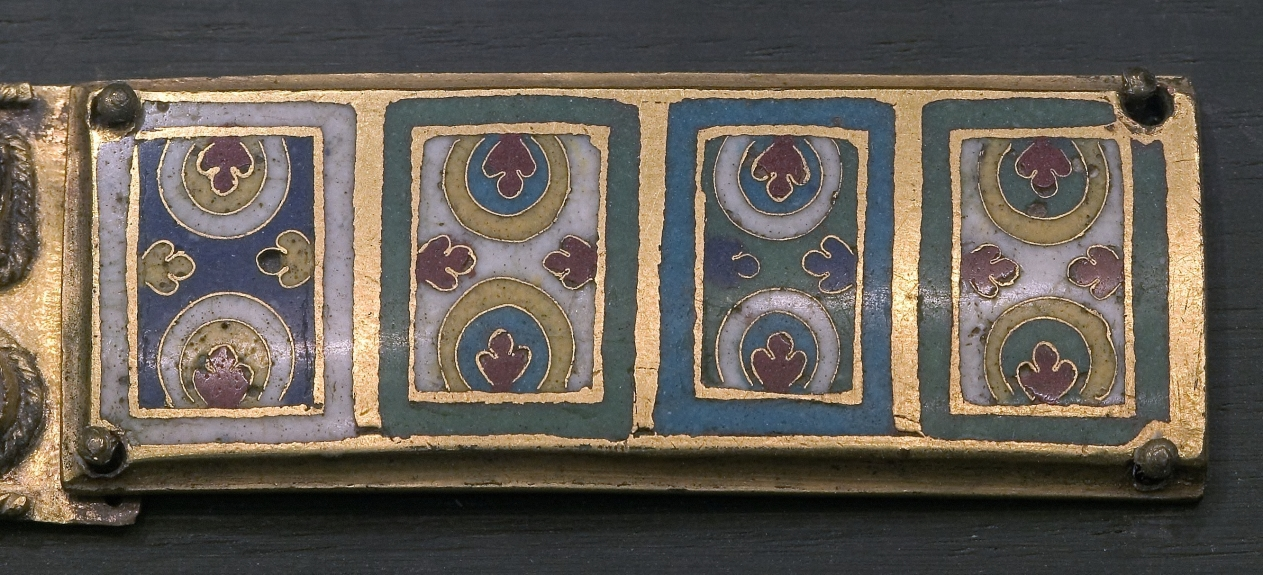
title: Plaque from a Reliquary Shrine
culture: Germany, Rhine Valley, Cologne, Romanesque period, 12th century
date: c. 1170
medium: gilded copper; champlevé and cloisonné enamel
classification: Enamel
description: These decorative enamel plaques (1953.274, 1953.638, 1957.502, and 1961.27) have been linked to some of Cologne's most important reliquary shrines, namely the shrine of the Three Kings at Cologne Cathedral and the shrines of Saints Maurinus and Albinus in the Benedictine abbey church of Saint Panteleon.